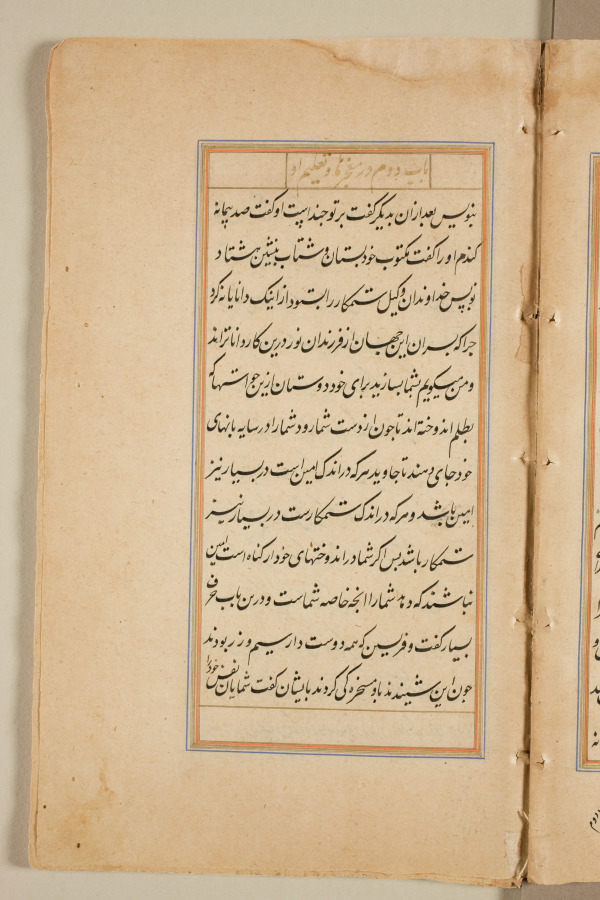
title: Text page from a Mirror of Holiness (Mir’at al-quds) of Father Jerome Xavier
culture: Mughal India, Allahabad, made for Prince Salim (1569–1627)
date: 1602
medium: Ink and gold on paper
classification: Manuscript